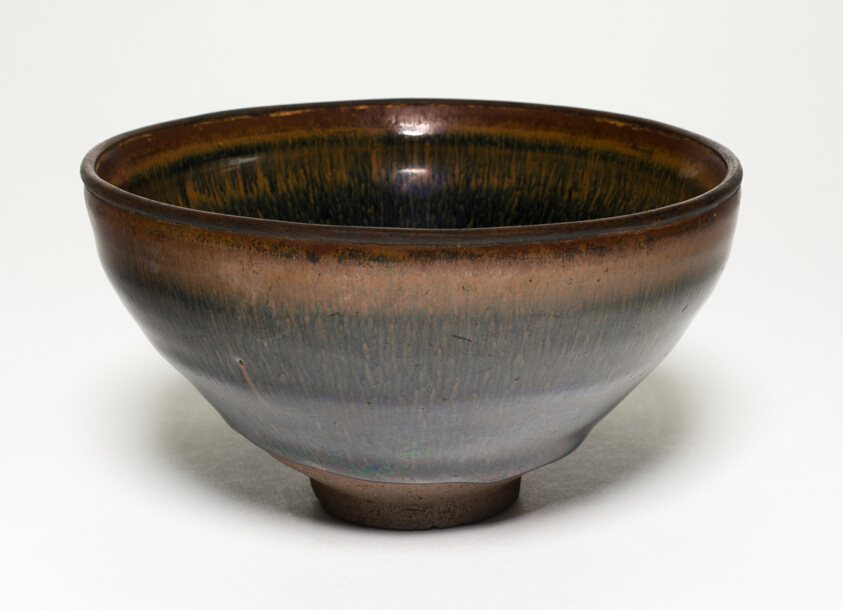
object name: Vessel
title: Tea Bowl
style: Chinese (culture or style)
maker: China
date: Song dynasty (960–1279)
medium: Jian ware; stoneware with dark brown "hare's fur" glaze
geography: China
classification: drinking vessel; stoneware; asian art; ceramics; vessel